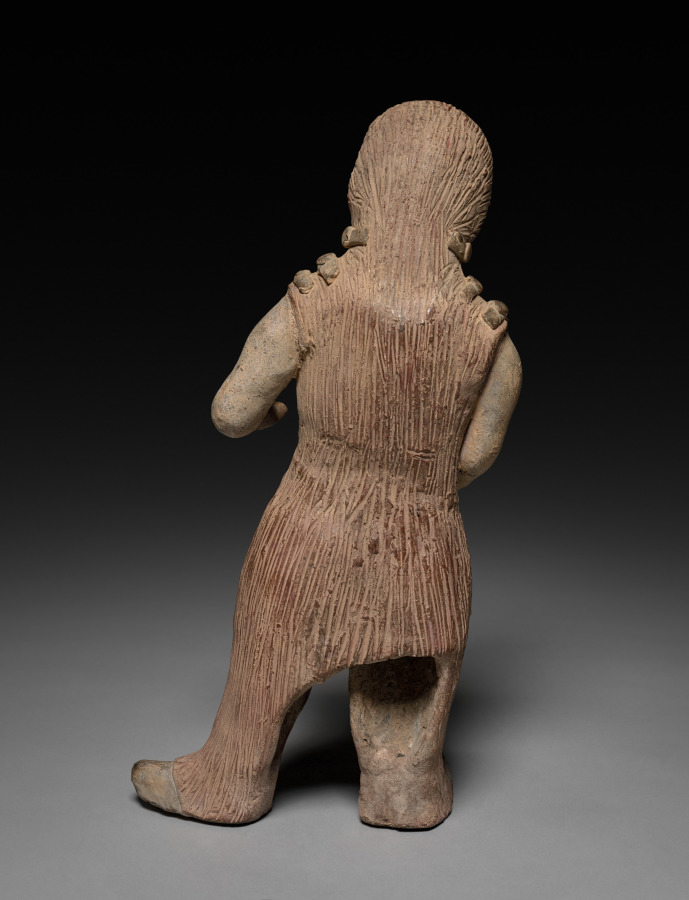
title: Figure of a Warrior in Leather Armor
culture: China, Modern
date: 20th Century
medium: buff earthenware with traces of polychromy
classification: Sculpture